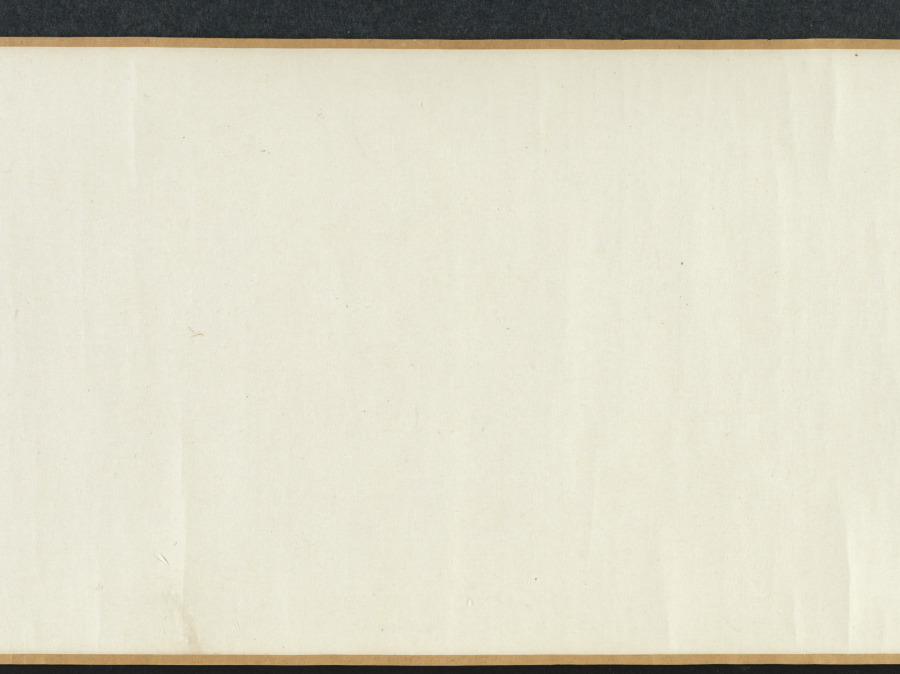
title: Zhao Mengfu Writing the Heart (Hridaya) Sutra in Exchange for Tea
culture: China, Ming dynasty (1368–1644)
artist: Qiu Ying (Chinese, 1494–1552)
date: 1542–43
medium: handscroll, ink and light color on paper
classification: Painting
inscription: Inscription accompanying text of "Heart" sutra, by Wen Zhengming 文徵明 (1470-1559): Zhengming 徵明, written in a boat at Kunshan 崑山, on the twenty-first day of the ninth month, in the renyin 壬寅 year, the twenty-first year of the Jiajing era [1542].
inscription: Colophon by Wang Shih-mou: Chou Yü-shün [Feng-lai] of K'un-shan was a scholarly, refined connoisseur of antiquities. He had acquired the poem written by Chao Ch'eng-chih [Chao Meng-fu] about the exchage of tea for Chao's calligraphy of the Prajna sutra. But the sutra itself, also written by Chao Meng-fu, is lost. He therefore asked Ch'iu Shih-fu [Ch'iu Ying] to do a painting and had Wen Cheng-ming, the artist-in-attendance, write the Hridaya Sutra in the "small, regular" style for replacement. Both works are so excellent that even Chao Meng-fu himself would certainly applaud if he should be reborn to see them. I, Shih-mou, had gotten possession of this scroll from the family of Chou Yü-shün, and since it was so wonderfully matched with one of the treasures in my collection. the Hridaya Sutra written by Chao Meng-fu for Priest Li in "running script," like the reuniting of two halves of a jade pi, I completed the scroll with the several colophons written for the "tea-exchange" poem. I did this because the painting of Ch'iu Ying and the calligraphy of Wen Cheng-ming are definitely masterpieces by themselves with absolutely no need to depend on any of the colophons written for the Chao Meng-fu poem. Furthermore, the two sons of Wen Cheng-ming, Shou-ch'eng [Wen P'eng] and Hsiu-ch'eng [Wen Chia]. have each written a colophon explaining the reason for replacing the calligraphy. As their writings are both acceptable for high standard, I didn't want to throw them away. [So by separating these into two scrolls] I was able to get two complete works of art in one clever stroke. I was quite pleased with myself, and hope that those who see this scroll shall not get suspicious because of the missing colophons. Wang Shih-mou wrote in his Jih-sun-chai study, on the first day of the tenth month, in the chia-shen year of the Wan-li era [1584].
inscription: Colophon by Wen P'eng: I-shao [Wang Hsi-chi] wrote in exchange for a flock of geese. Su Tung-po wrote in exchange for meat. Both episodes have become legends of a thousand years. Sung-hsüeh [Chao Meng-fu] "teased" Priest Kung for tea, and the story was immediately immortalized in the poems by all the famous scholars of the times. Indeed, how could one say his humor and elegance are not equal to the ancient worthies? Unfortunately, the poetry has survived but the writing of the sutra is lost. Yü-shün [Chou Feng-lai] therefore asked my father to make up the writing and so here is the complete work of art. Respectfully inscribed by Wen P'eng in the mid-summer of 1543.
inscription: Colophon by Wen Chia: Sung-hsüeh [Chao Meng-fu], in exchanging tea leaves for his writing of the Prajna, had put himself in the company of Yu-chün [Wang Hsi-chih] who exchanged geese for his writing of the Huang-t'ing sutra [the Yellow Chamber, or the Wai-ching ching, a Taoist text attributed to the Yellow Emperor]. However, was this romantic and cultivated gesture really intended for such small things? Actually, he was only proud that the excellence of his calligraphy had made him worthy to be the successor of the Ch'in Dynasty master. Since, very unfortunately, Chao Meng-fu's writing [of the Prajna] was already lost, my father therefore agreed to replace it, and did the calligraphy in the style of the Yellow Chamber. In addition, Yu-shün [Chou Feng-lai] had asked Mr. Ch'iu Shih-fu [Ch'iu Ying] to do a painting of the sutra writing story in the style of Li Lung-mien at the head of the scroll. Now it would seem the entire episode should go down in history for immortality. Respectfully recorded by Wen Chia, on the eighth day of the eighth month, in the year of k'uei-mao [1543]. trans. WKH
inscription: 4 colophons and 23 seals: 1 colophon, dated 1543, and 2 seals of Wen Peng (1498-1573); 1 colophon, dated 1543, and 2 seals of Wen Chia (1501-1583); 1 colophon, dated 1584, and 3 seals of Wang Shih-mou (1536-1588); 2 seals of Chou Feng-lai (16th c.); 3 seals of Sung Lo (1634-1713); 5 seals of the Ch'ien-lung emperor (r. 1736-95); 1 colophon, dated 1902, and 1 seal of Fei Nien-tz'u (1885-1905); 4 seals of Wan-go H. C. Weng (b. 1918); 1 seal unidentified.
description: The Yuan dynasty calligrapher Zhao Mengfu (1254–1322) is said to have transcribed the Heart Sutra for a certain priest named Li in exchange for tea. Later, during the Ming dynasty, the professional painter Qiu Ying from Suzhou painted this scene for his patron. Here, Zhao Mengfu holds a brush and has a piece of paper laid out before him. On the table is an ink stone, an ink stick, and a small water dropper. Drops of water would dissolve the ink stick into liquid ink when it was ground on the flat square stone.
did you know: Qiu Ying was born to a peasant family, but his natural talent led him to a successful career as a professional painter with wealthy patrons.